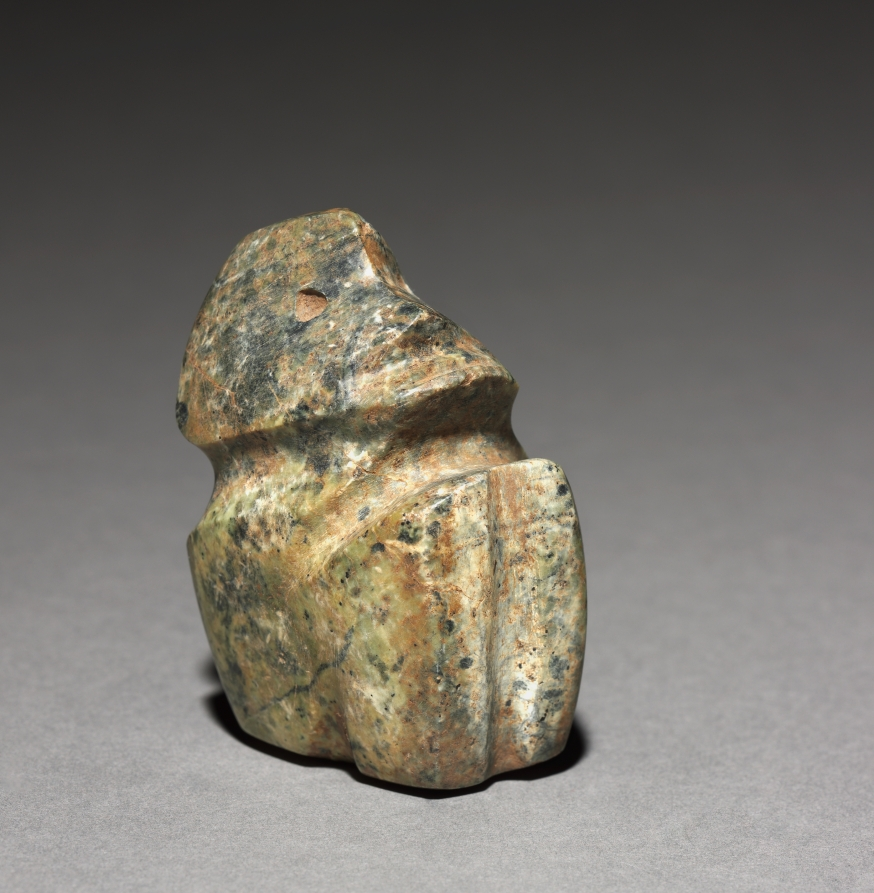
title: Seated Figure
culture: Mesoamerica, Mexico, Guerrero, Mezcala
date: 100 BCE–300 CE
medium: serpentine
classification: Sculpture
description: The Mezcala style takes its name from a river in its homeland, the Guerrero region of western Mexico. The style is known for small-scale sculptures characterized by sleek abstraction and often made of greenstone, one of the most precious materials that Mesoamerican artists worked. Unfortunately, little is known of the sculptures’ meanings and archaeological contexts.